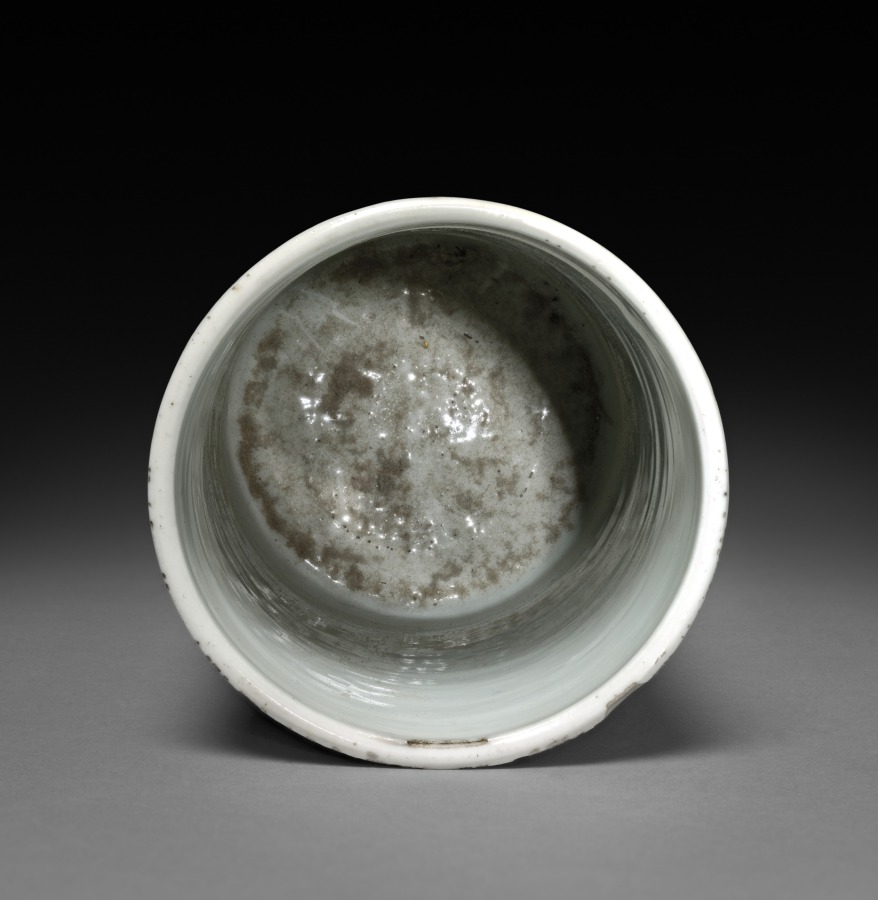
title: Brush Holder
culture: China, Jiangxi Province, Jingdezhen kilns, "Transitional period," Ming dynasty (1368–1644), Chongzhen reign (1628–1644)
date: 1628–44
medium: porcelain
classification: Ceramic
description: This porcelain brush holder is considered to have been made in the "Transitional period," a term used to define the period between about 1620 and 1683 when official kilns in Jingdezhen were no longer under imperial supervision due to the transition from the Ming to the Qing dynasties.